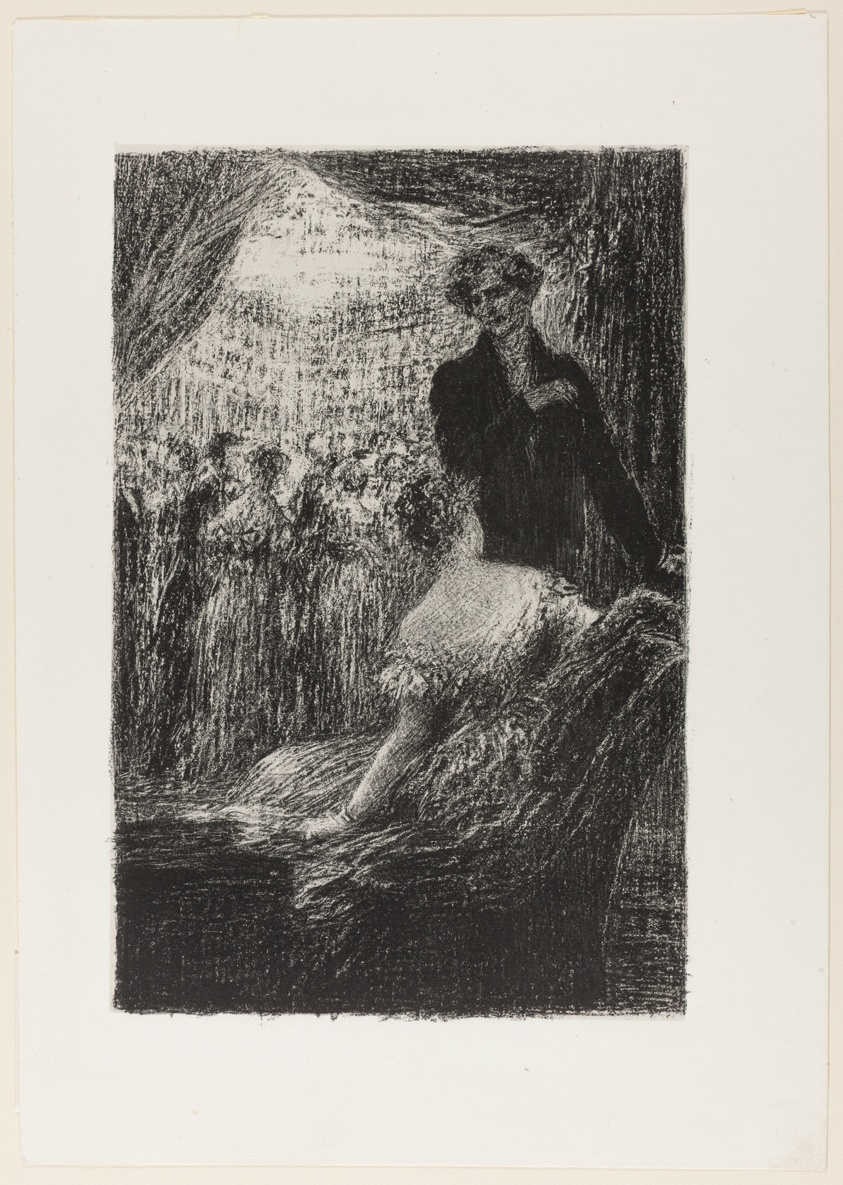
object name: Print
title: Symphonie Fantastique: A Ball, from Hector Berlioz, sa vie et ses oeuvres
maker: Henri Fantin-Latour (French, 1836-1904)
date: 1888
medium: Lithograph in black on off-white China paper, laid down on white wove paper (chine collé)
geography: France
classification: lithograph; print; prints and drawing